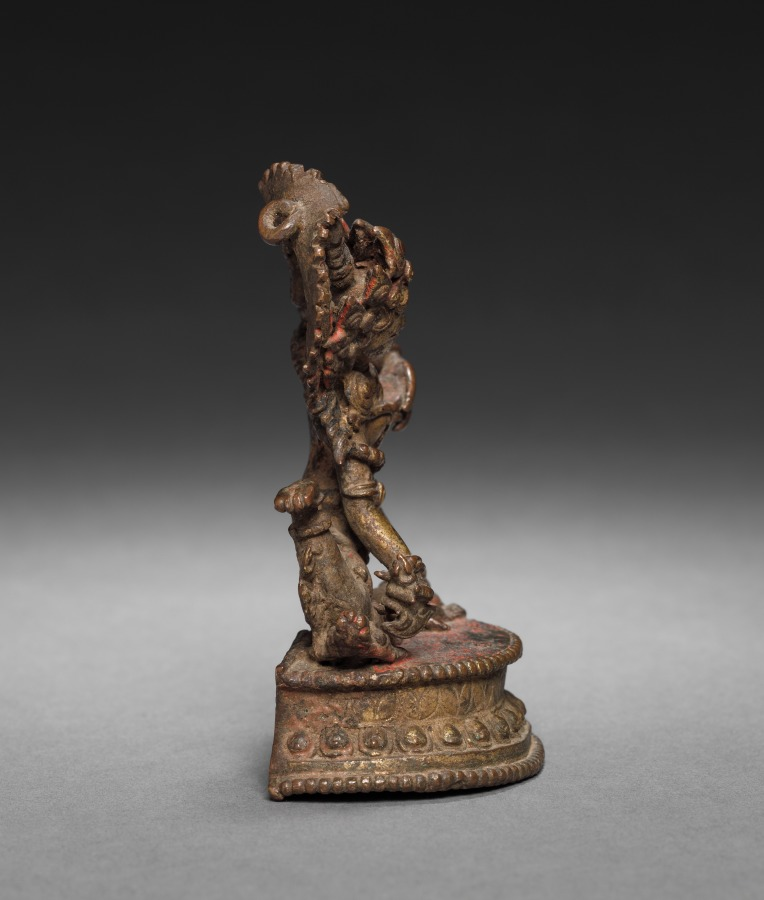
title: Achala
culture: Nepal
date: 1500s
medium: brass or bronze; turquoise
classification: Sculpture